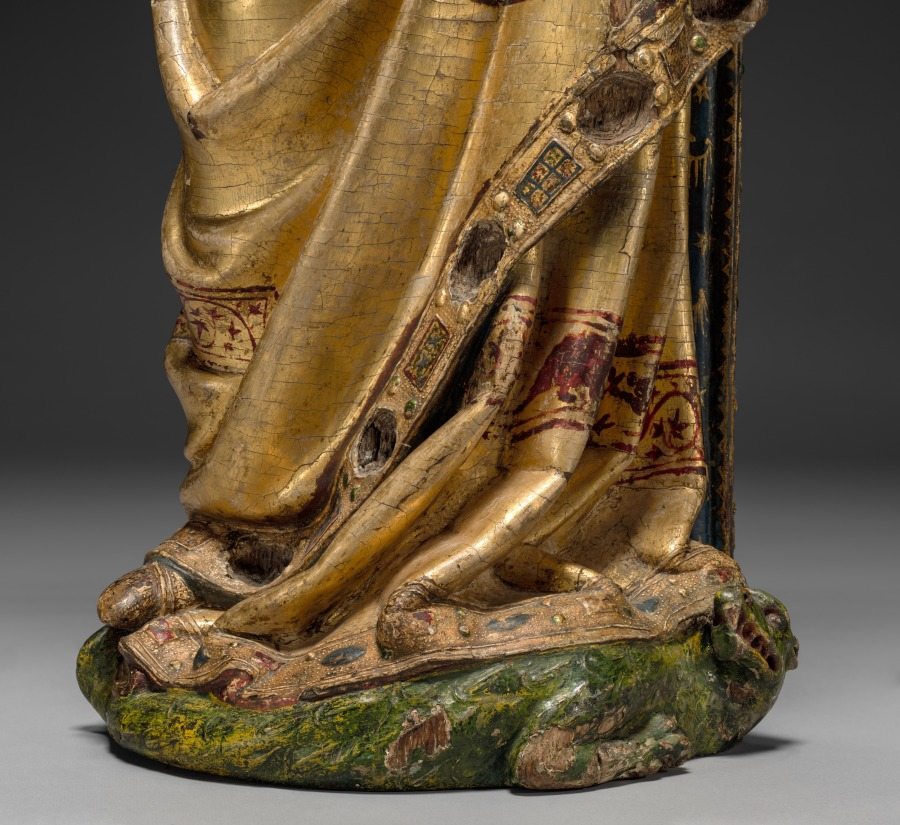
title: Virgin and Child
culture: Mosan (Valley of the Meuse), Liège(?), late 13th century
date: late 1200s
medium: wood (oak) with polychromy and gilding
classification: Sculpture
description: This sculpture is a rare survival in wood from the valley of the Meuse River (modern Belgium and Holland), an important region for the production of ecclesiastical art in the 1100s and 1200s. The elegantly draped figure is remarkable for the preservation of much of its original paint and gilding, including the Virgin's gilded mantle highlighted with decorative bands of geometric patterns and the green dragon on which she stands. There are small settings around the Virgin's neck and along the border of the mantle that would have originally been set with gem and glass cabochons in imitation of the richly adorned metalwork for which Mosan art was highly esteemed. The settings for these cabochons provide some hint of the original opulence of this sculpture. The Virgin's serene features and beautiful countenance are noteworthy, as is the refined execution of the draperies.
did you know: Dragons, like the one Mary is standing on, sometimes look more like snakes in medieval art.